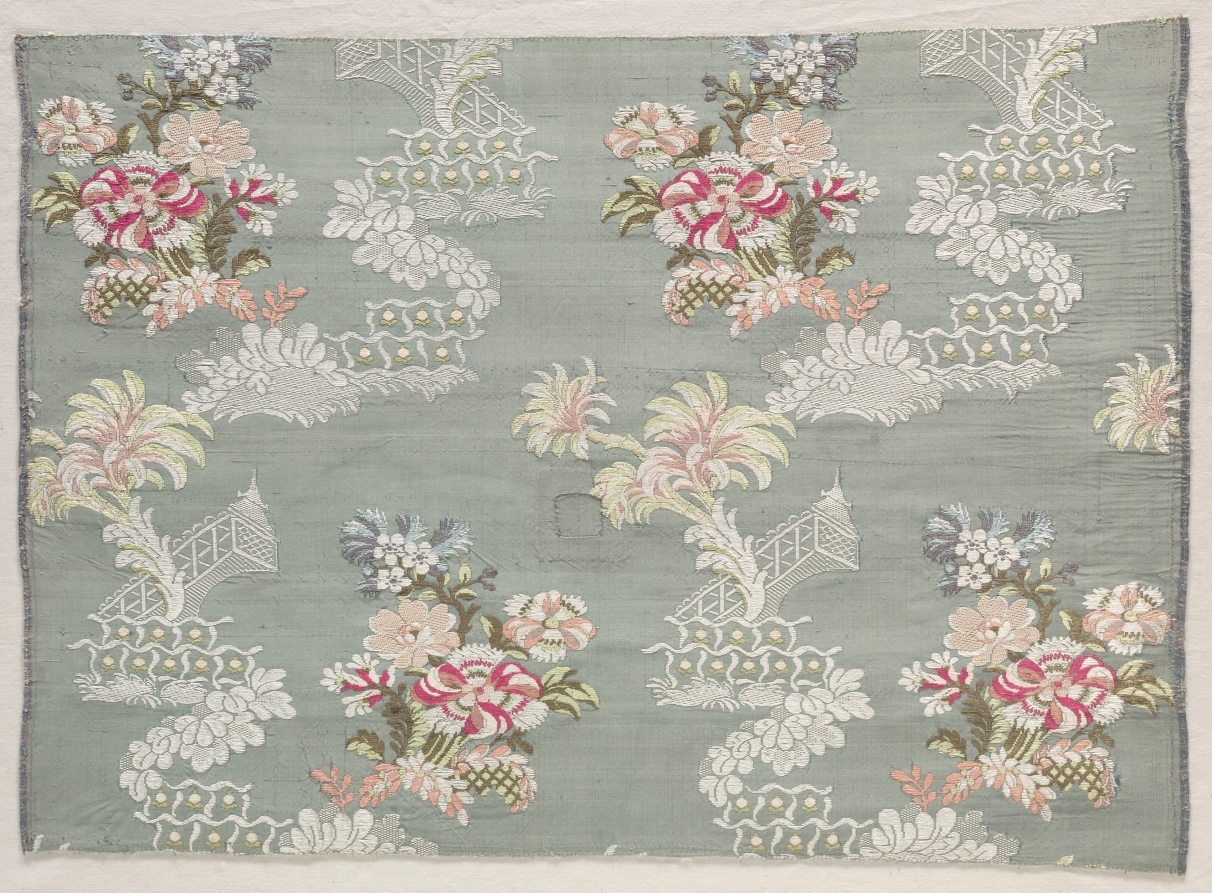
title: Taffeta, Brocaded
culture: France, mid 18th century, Period of Louis XV (1723-1774)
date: c. 1750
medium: taffeta, brocaded; silk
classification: Textile